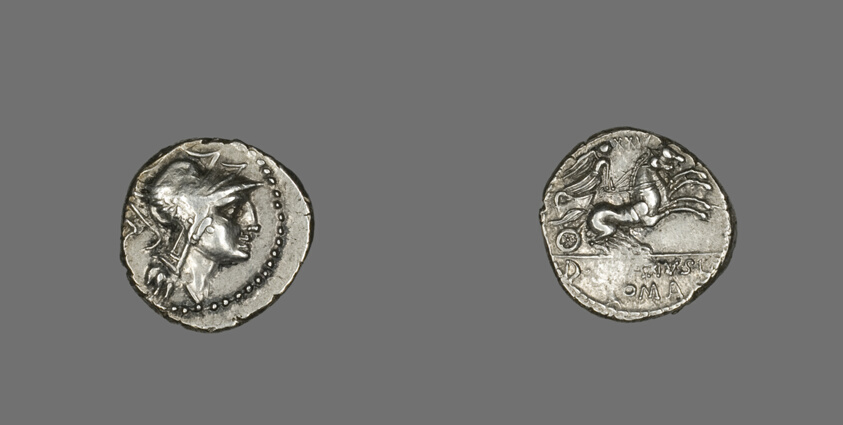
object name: Coin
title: Denarius (Coin) Depicting the Goddess Roma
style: republic period, ancient, roman (ancient, style or period)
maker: Roman, minted in Rome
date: 91 BCE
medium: Silver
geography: Italy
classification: coin; ancient art; struck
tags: goddesses, Chariots